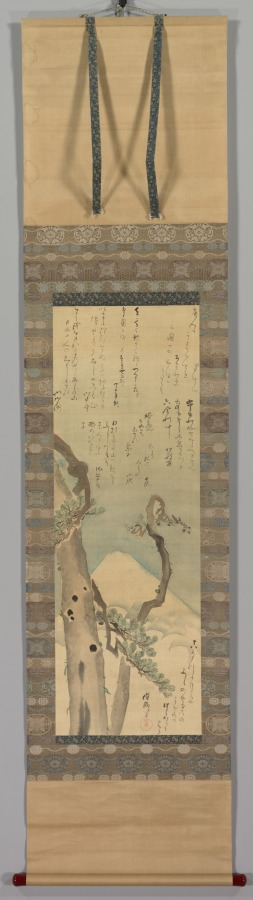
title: Mt. Fuji through Pines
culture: Japan, Edo period (1615–1868)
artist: Kubo Shunman (Japanese, 1757–1820)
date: late 1700s-early 1800s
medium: hanging scroll, ink and color on silk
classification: Painting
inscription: Signed: painted by Shunman and others (Shunman narabi utsu [su]) Sealed: Shunman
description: Kubo Shunman dashed off this loose image of Mt. Fuji viewed in the distance from behind pine trees as a performance painting, or sekiga. He did it on the spot in the company of members of his poetry club. Six of them, including the club's founder Yadoya no Meshimori (Rokujuen, 1753–1830), added kyoka poems, 31-syllable poems like the classical Japanese waka poem in form, but with a heavy emphasis on humor. Shunman jotted down a poem as well, in the bottom right corner of the painting, before signing and sealing it. Each poem takes the painted image as its point of departure.